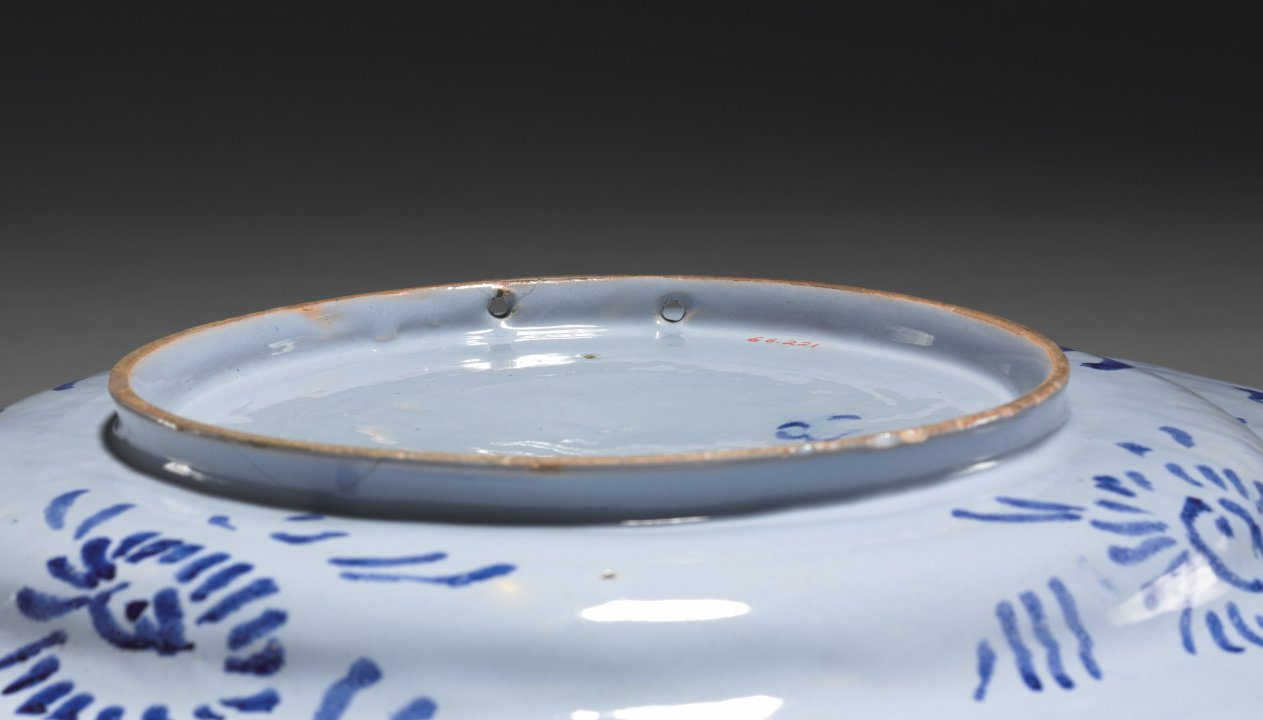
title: Large Plate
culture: France, late 17th Century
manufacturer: Nevers Factory (French)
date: late 1600s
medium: faience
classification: Ceramic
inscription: on front, inscribed: Moderata. durant.